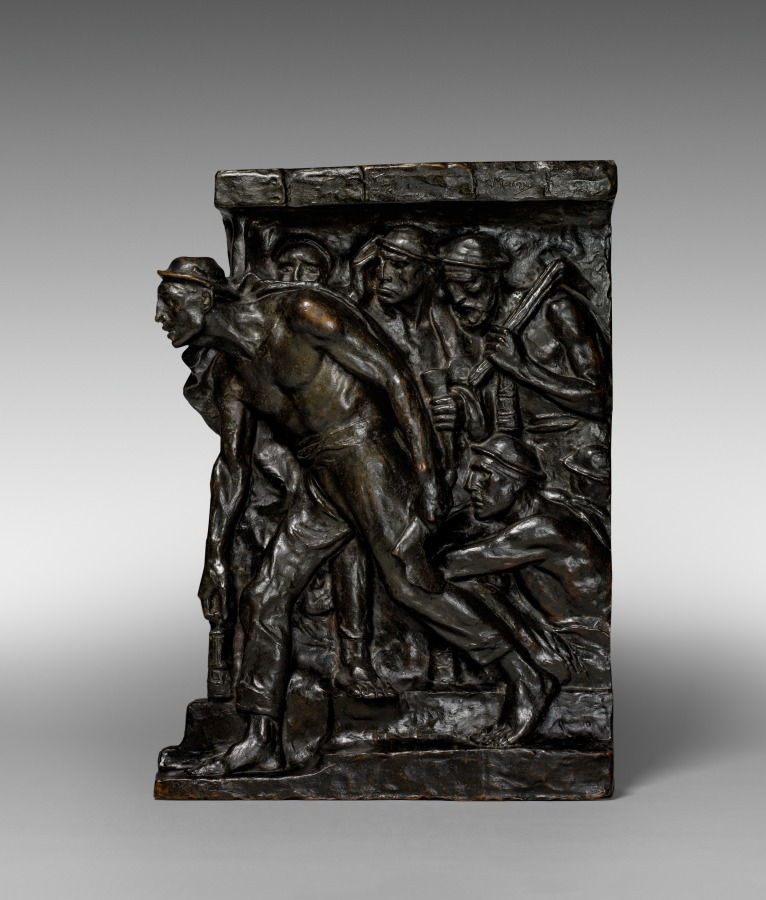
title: The Miners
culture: Belgium, 19th century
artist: Constantin Meunier (Belgian, 1831–1905)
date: c. 1890 – 1900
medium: bronze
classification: Sculpture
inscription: Signed on top: "C. Meunier"; inscribed on right side: "Atelier C. Meunier, 50 Rue (?)"